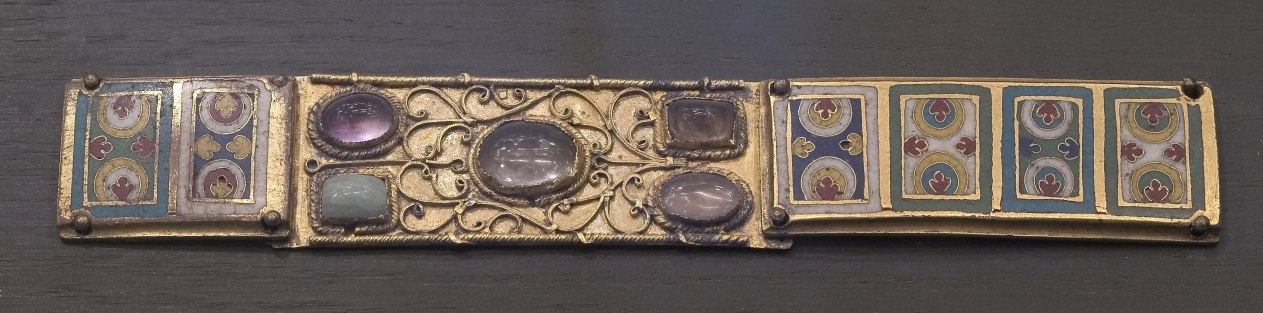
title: Plaque from a Reliquary Shrine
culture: Germany, Rhine Valley, Cologne, Romanesque period, 12th century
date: c. 1170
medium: gilded copper; champlevé and cloisonné enamel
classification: Enamel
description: These decorative enamel plaques (1953.274, 1953.638, 1957.502, and 1961.27) have been linked to some of Cologne's most important reliquary shrines, namely the shrine of the Three Kings at Cologne Cathedral and the shrines of Saints Maurinus and Albinus in the Benedictine abbey church of Saint Panteleon.